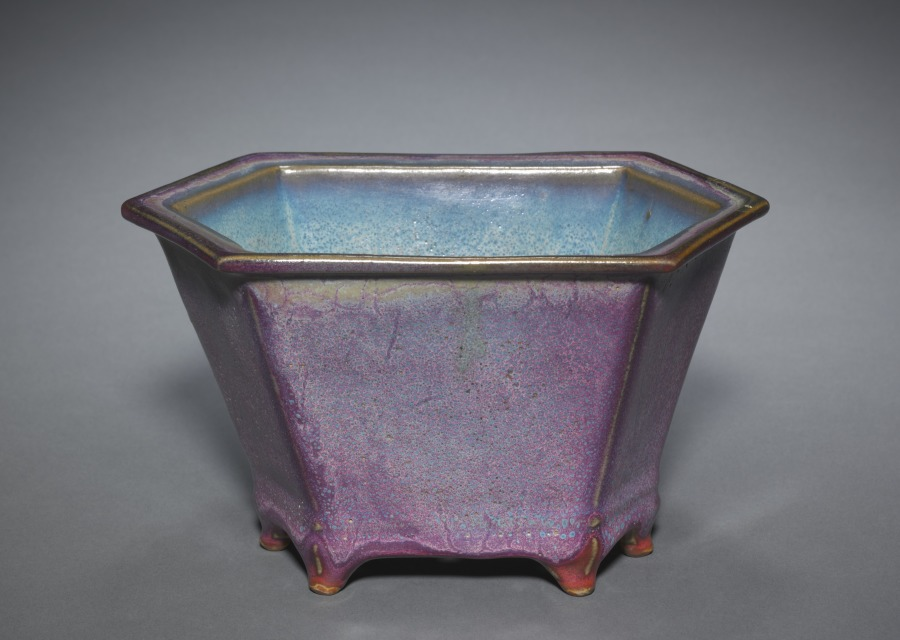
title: Hexagonal Flower Pot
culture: China, Henan province, Yuxian, Juntai, Ming dynasty (1368-1644)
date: 1300s–1400s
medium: porcelaneous stoneware, numbered Jun ware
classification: Ceramic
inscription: 八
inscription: 明窓用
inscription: 養心殿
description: This deep hexagonal flowerpot, one of a pair in the collection, is numbered "8" and bears additional inscriptions to indicate specifically the location of its usage within the palace: "for use in the Study of Illumination (Mingchuang yong)" within the "Hall of Cultivating the Mind (Yangxin Dian)" of the Forbidden City. The inscriptions seem to suggest the Qing imperial provenance of this flower pot.